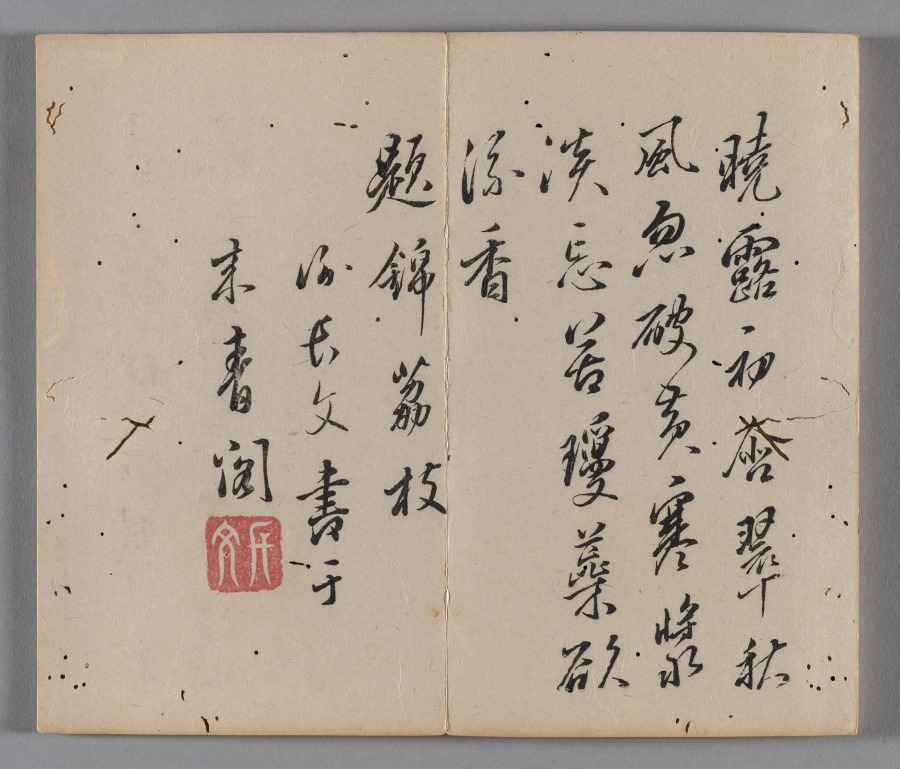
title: Ten Bamboo Studio Painting and Calligraphy Handbook (Shizhuzhai shuhua pu): Fruit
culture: China, Qing dynasty (1644-1911)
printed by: Hu Zhengyan (Chinese, c. 1584–1674)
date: 1633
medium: Woodblock-printed book; ink and colors on paper; first edition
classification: Print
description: Color printing reached a level of perfection in the early 1600s, as seen in this Ten Bamboo Studio Collection of Calligraphy and Painting and the Mustard Seed Garden Manual of Painting (printed 1679 and 1701). The painterly quality, precision in registering (aligning) the woodblocks, and harmonious colors made them the most successful color print editions in Chinese history. Both editions were printed and compiled in Nanjing, spread nationwide, and had a great impact on the arts in Japan and Korea.